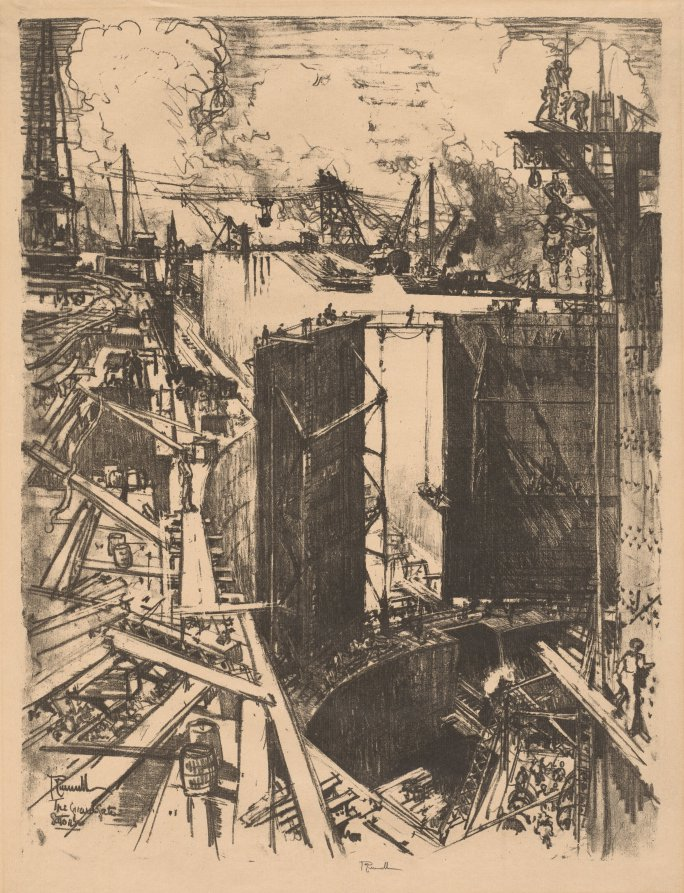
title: The Guard-Gate, Gatun Lock, Panama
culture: America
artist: Joseph Pennell (American, 1857–1926)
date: 1912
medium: lithograph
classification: Print